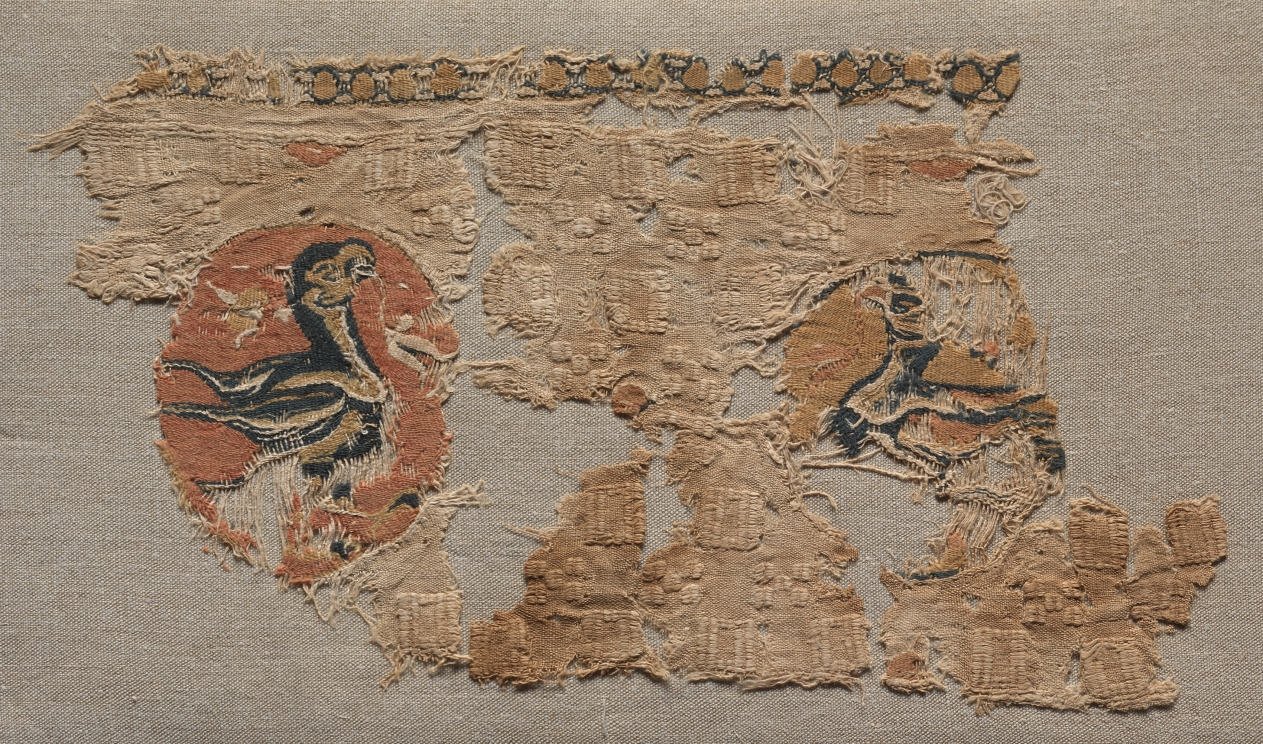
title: Hanging with birds in roundels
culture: Egypt, al-Bahnasa, Tulunid period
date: 800s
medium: plain weave with inwoven tapestry weave and supplementary wefts: linen and wool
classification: Textile